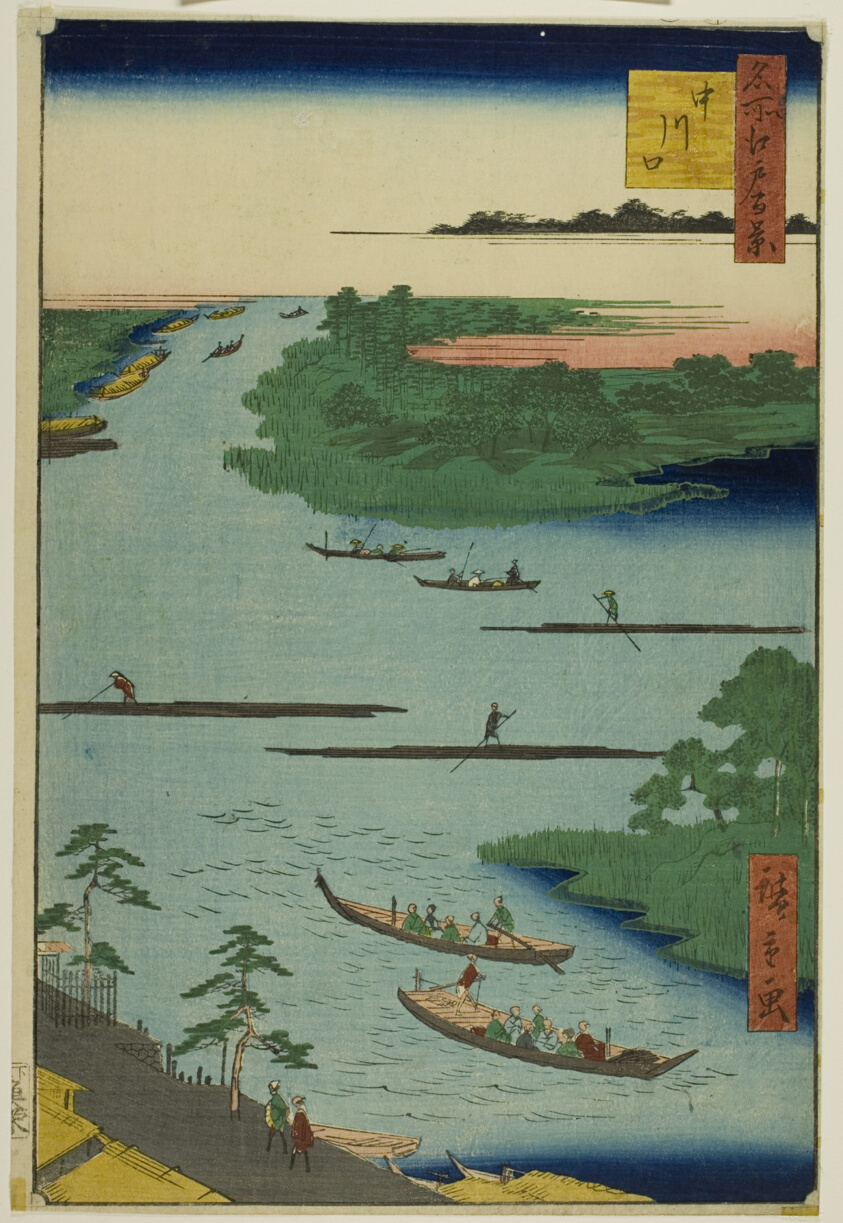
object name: Print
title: Mouth of the Nakawaga River (Nakagawaguchi), from the series “One Hundred Famous Views of Edo (Meisho Edo hyakkei)”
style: Japanese (culture or style)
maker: Utagawa Hiroshige 歌川 広重; Japanese, 1797–1858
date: 1857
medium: Color woodblock print; oban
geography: Japan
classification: woodblock print; print